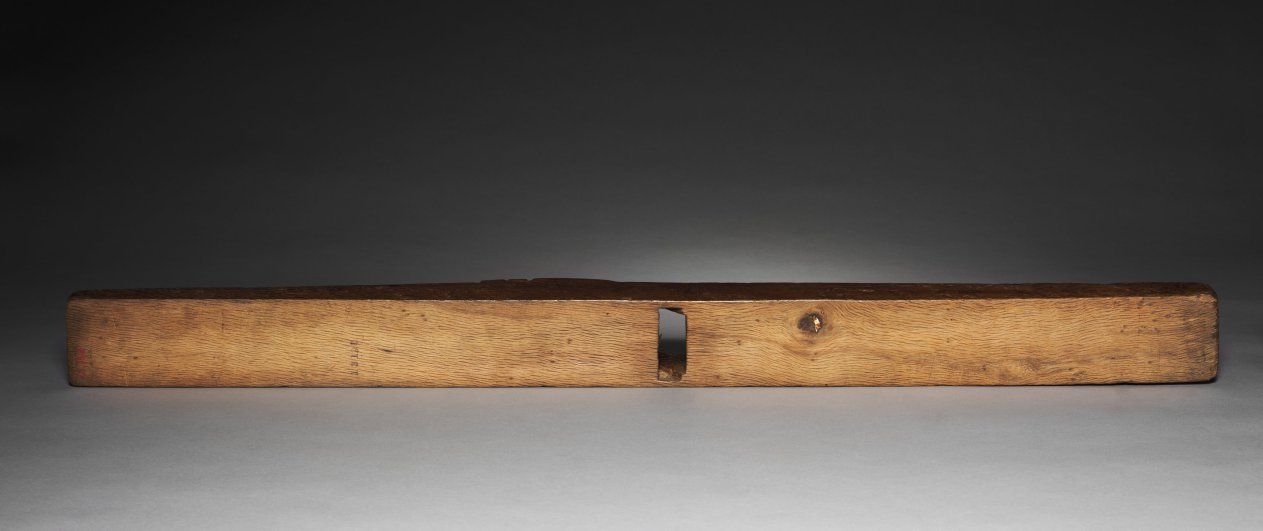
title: Plane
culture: France, 17th century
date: 1600s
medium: wood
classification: Tool